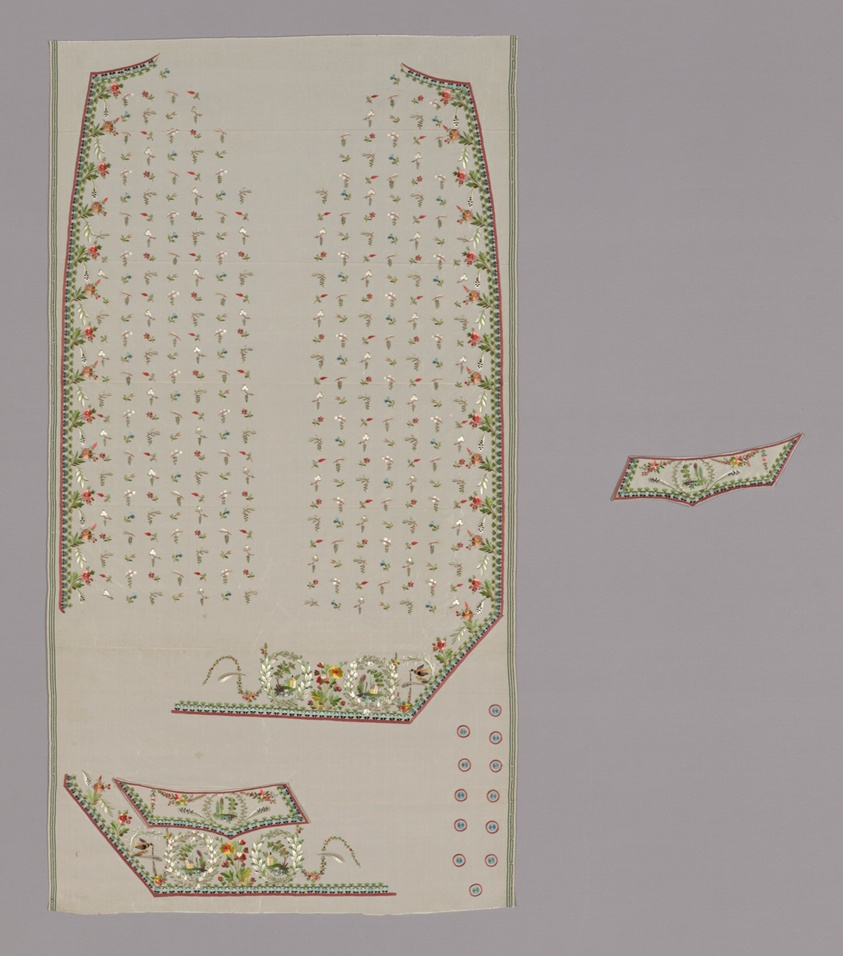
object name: Costume and Accessories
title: Embroidered Fabric for a Man's Waistcoat Front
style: 18th Century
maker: France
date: 1780s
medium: Silk, plain weave; embroidered with silk thread in individual back, outline, running, satin, split and stem stitches; couching; laid work and French knots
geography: France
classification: costume; needlework (visual works); waistcoat (garment); textile; costume - embroidery; needlework - costume; garment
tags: floral motifs, flowers, foliage, white (color), green (color), pink (color), building, floral, bird, wreaths, feathers, fashion, houses